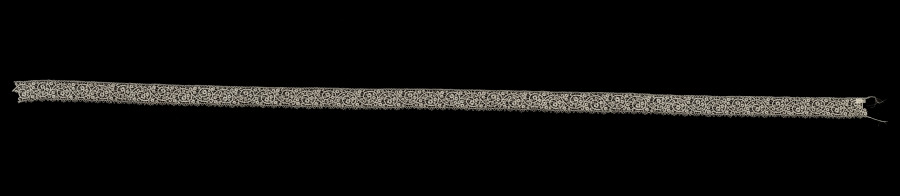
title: Lace Edging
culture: Belgium (Flanders)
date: 1900–1935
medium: Cotton: bobbin lace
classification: Lace